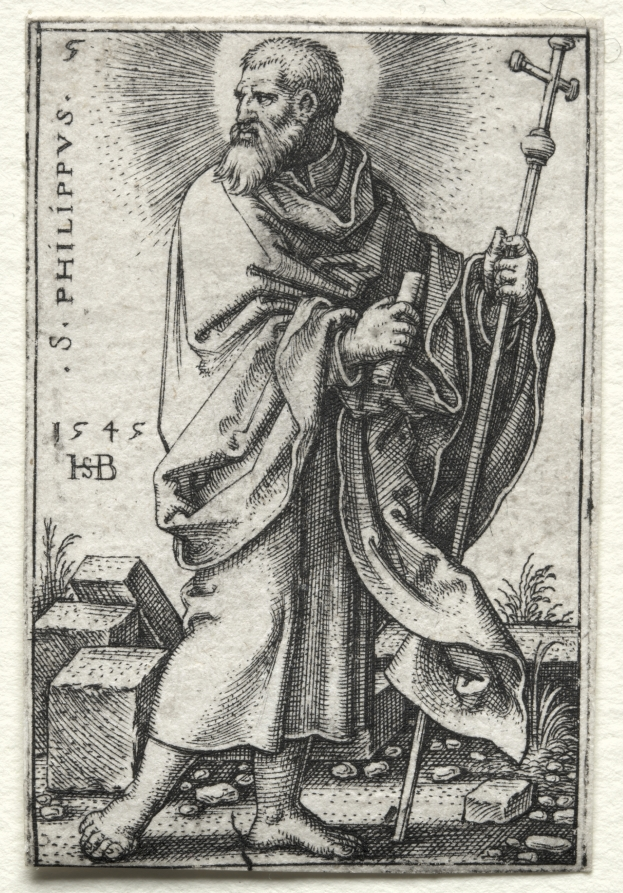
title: St. Philip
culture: Germany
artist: Hans Sebald Beham (German, 1500–1550)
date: 1545–1546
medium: engraving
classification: Print